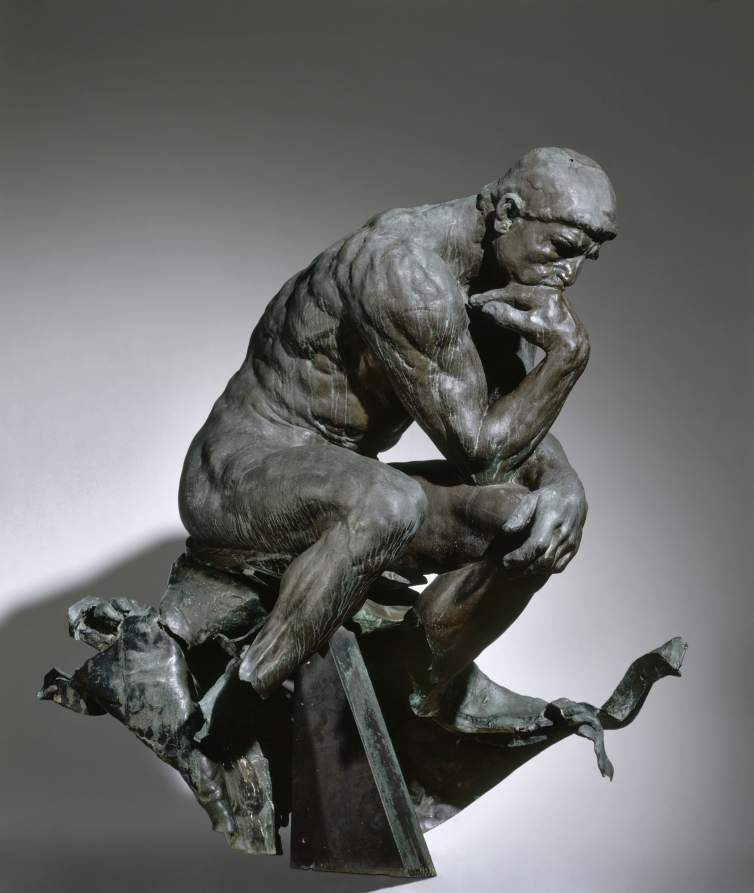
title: The Thinker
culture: France, 19th century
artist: Auguste Rodin (French, 1840–1917)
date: 1880–81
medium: bronze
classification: Sculpture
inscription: signed on base near sinister foot: "A. Rodin."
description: The Thinker was first developed as part of Rodin's The Gates of Hell, a sculptured doorway for a proposed museum of decorative arts in Paris. Intended to be part of a relief directly above the doors, the rugged figure was originally conceived as a generalized image of the Italian poet Dante Alighieri (1265–1321), who wrote the Divine Comedy.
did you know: This enlarged version of The Thinker is one of less than 10 cast during Rodin's lifetime.